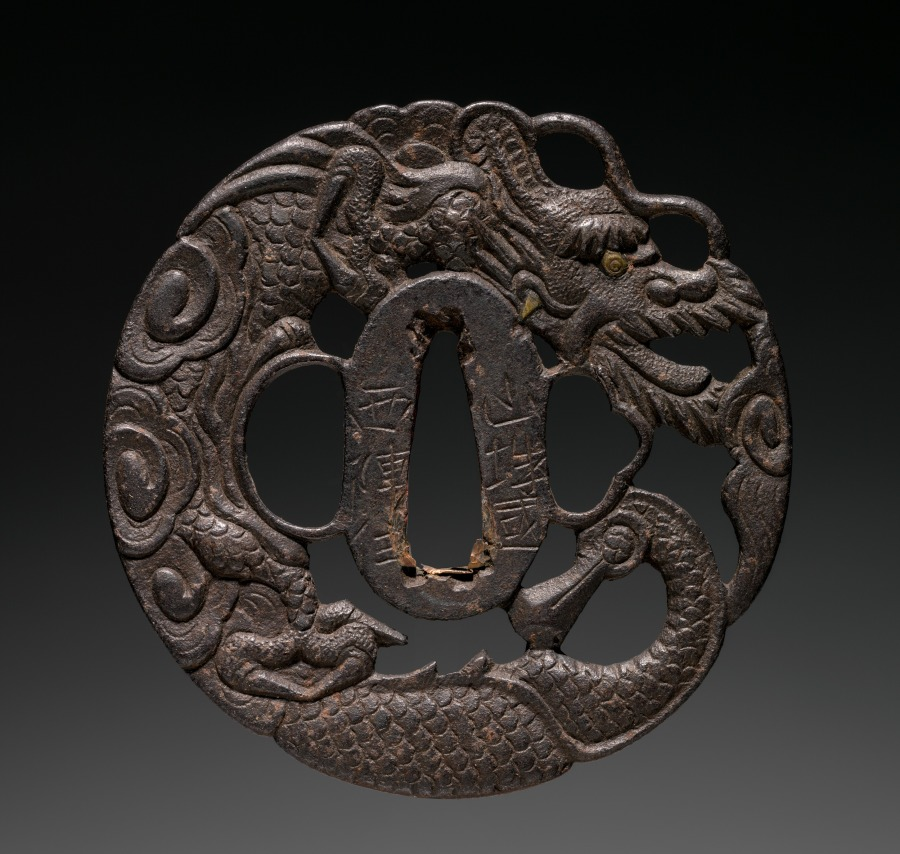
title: Sword Guard (Tsuba) with Dragon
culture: Japan, possibly Edo period (1615-1868)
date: c. 1615–1868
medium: iron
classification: Arms and Armor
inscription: 山城国西陳住埋忠